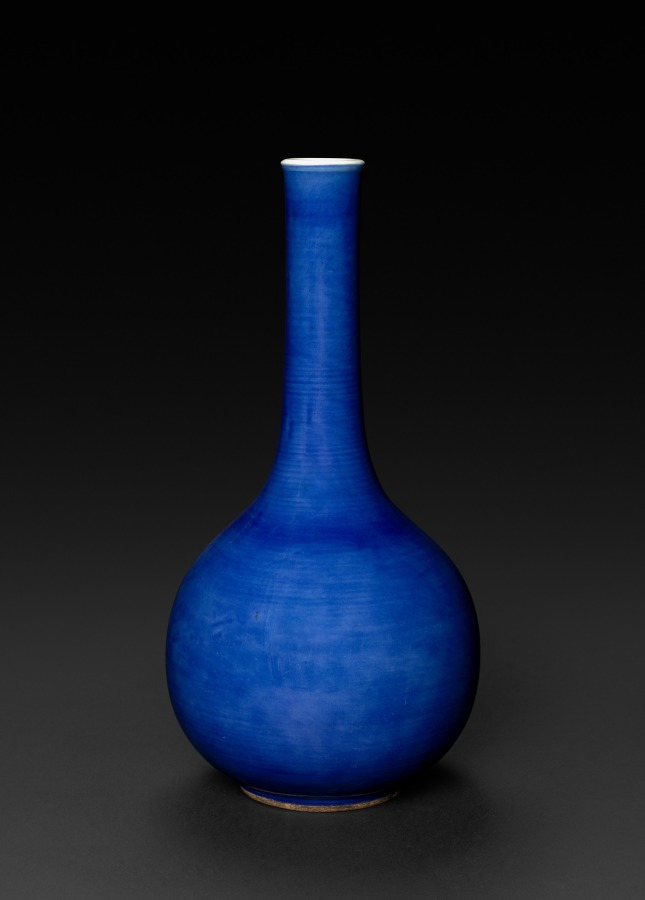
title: Bottle Vase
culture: China, Qing dynasty (1644-1911), Kangxi reign (1662-1722)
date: 1662–1722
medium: porcelain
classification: Ceramic